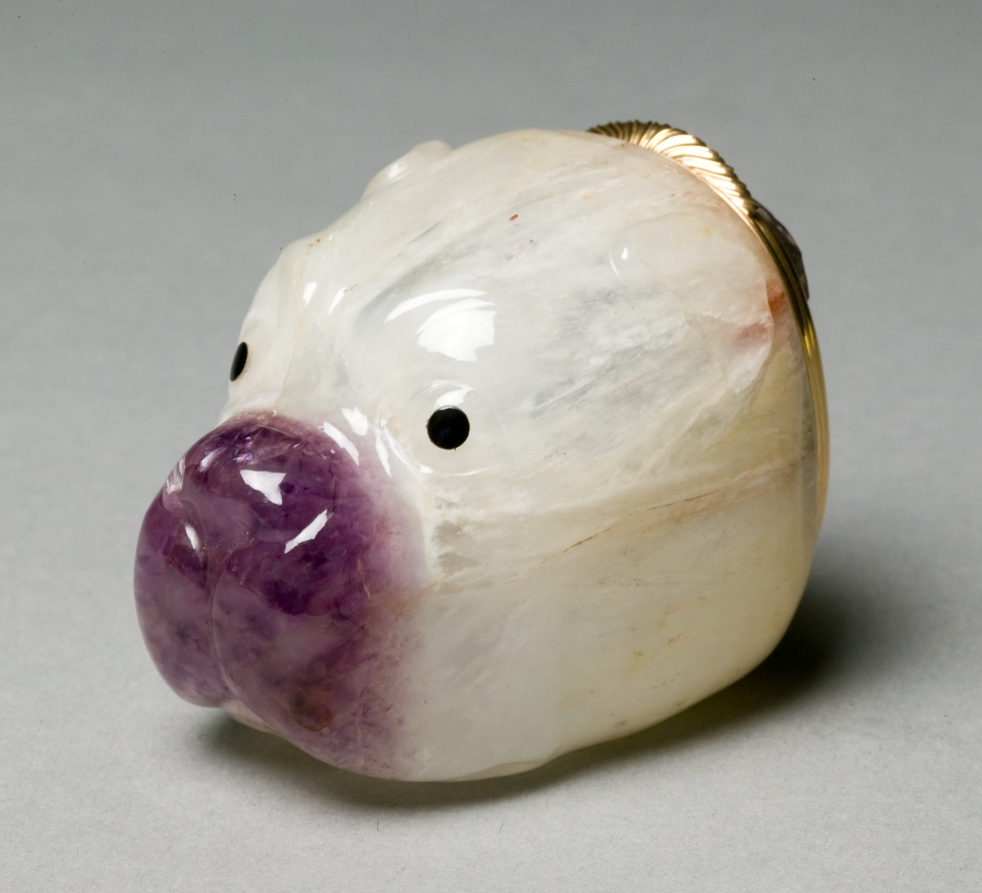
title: Snuff Box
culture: Germany, 18th century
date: c. 1770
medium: amethystine quartz, diamondsine-quartz, gold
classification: Miscellaneous